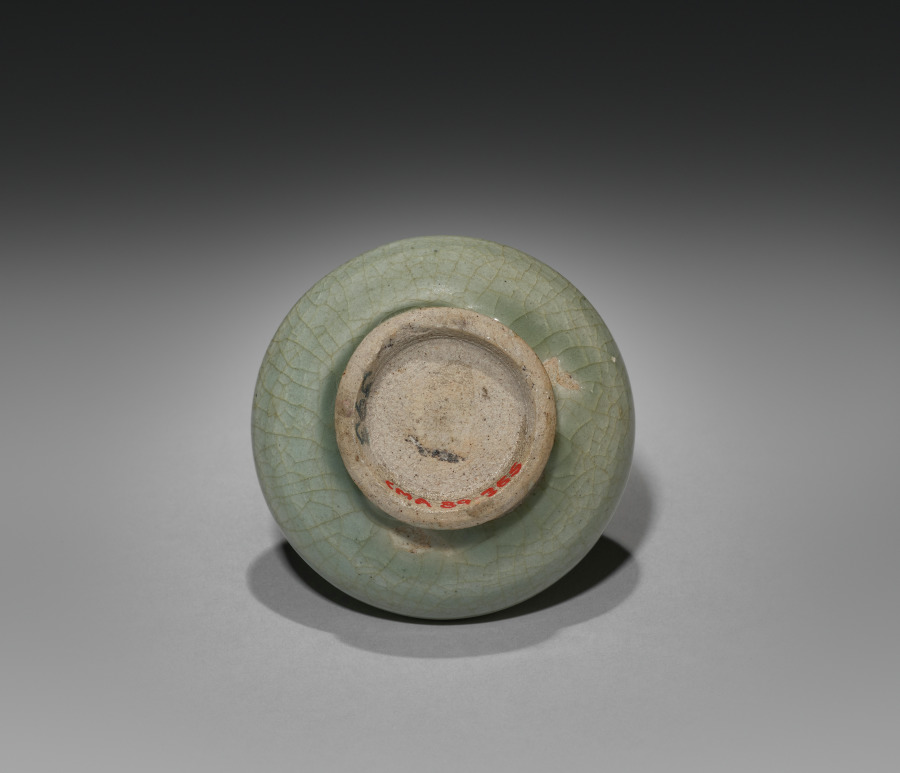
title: Small Jar: Sawankhalok Ware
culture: Thailand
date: 1300s–1400s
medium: porcelain with celadon glaze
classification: Ceramic